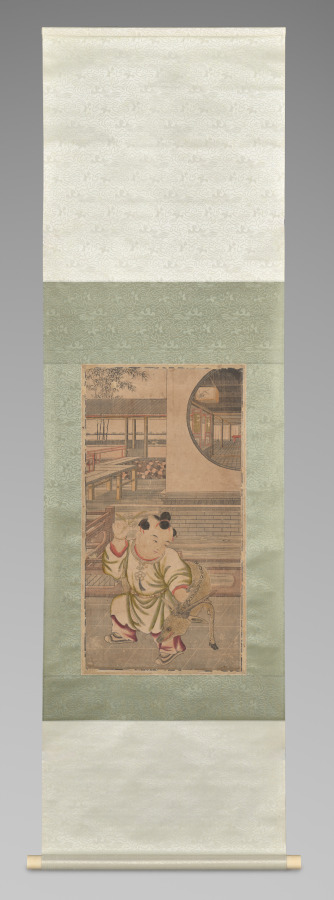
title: Rise in Rank and Attain Wealth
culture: China, Qing dynasty (1644–1911), Qianlong reign (1736–95)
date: 1736–95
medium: Hanging scroll; polychrome woodblock print; ink and color on paper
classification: Print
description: Woodblock printing in color reached a height in China in the 1600s to 1700s. The prints were executed by means of sets of separate blocks, each carved to print a different color.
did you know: In the 1600s, printing flourished in such Jiangnan cities as Nanjing, Suzhou, Hangzhou, and Huizhou, evolving from privately enjoyed illustrated books printed in color to more commercialized single-sheet color prints that were hung on walls and became part of the rich urban visual culture.